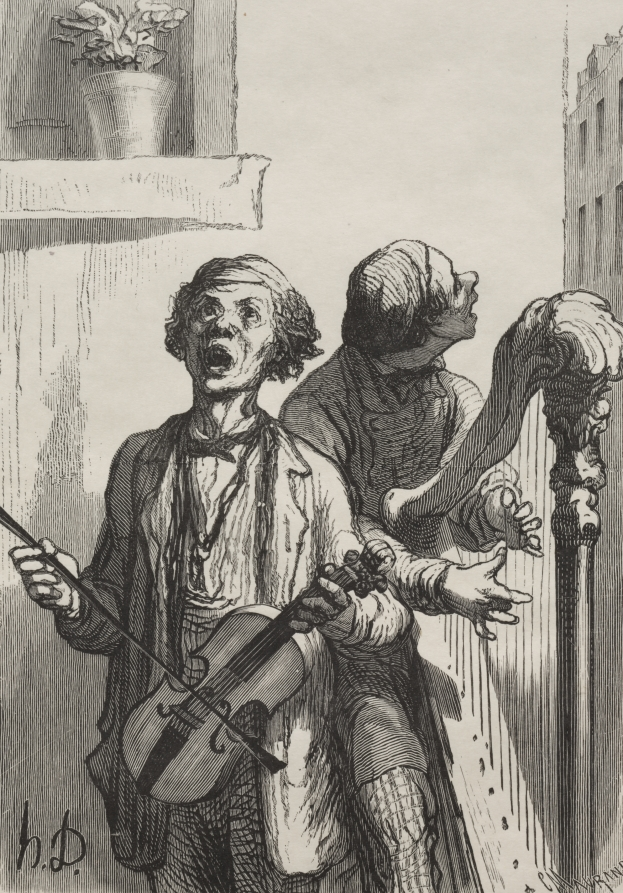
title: Street Singers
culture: France, 19th century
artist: Honoré Daumier (French, 1808–1879)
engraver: Charles Maurand (French, 1824–1904)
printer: François Louis Schmied (Swiss, 1873–1941)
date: 1862, printed 1920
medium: wood engraving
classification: Print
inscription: Lower margin, pencil: 42/75 ; red stamp: FLS